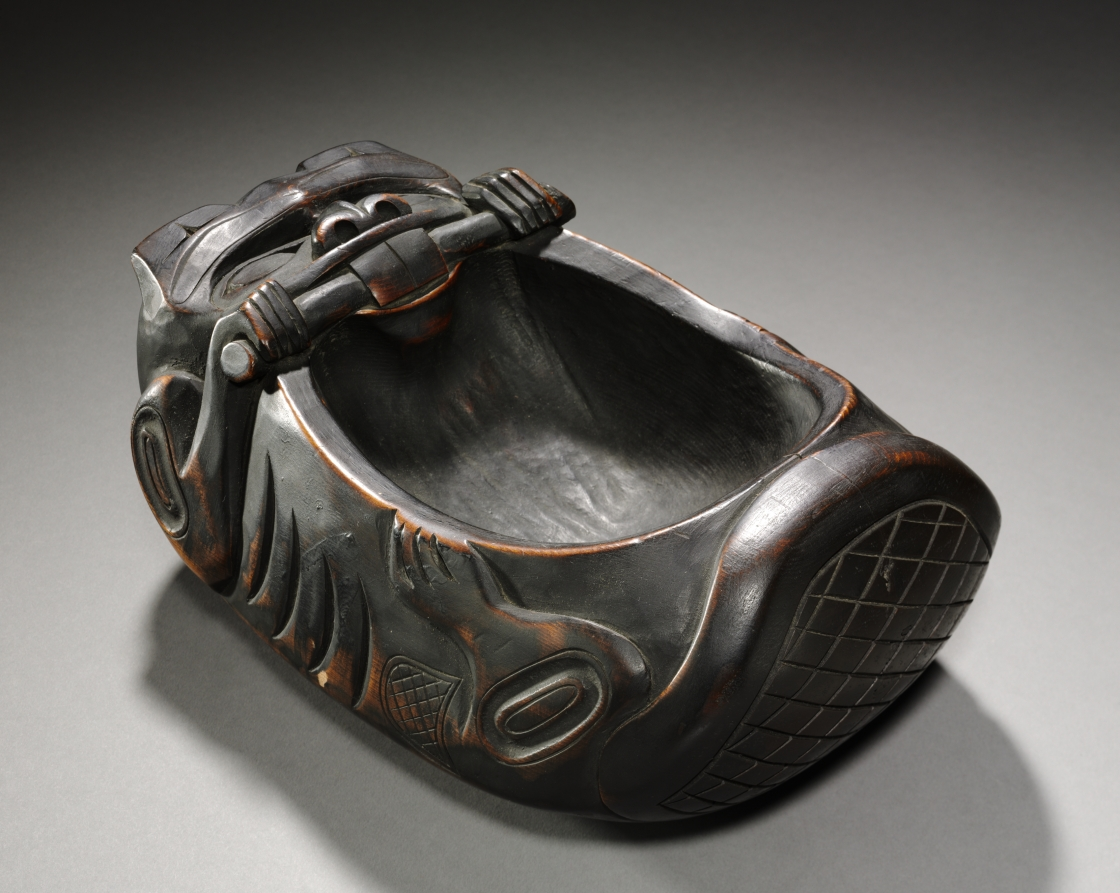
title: Beaver-Shaped Bowl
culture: Native North America, Northwest Coast, Alaska, Tlingit?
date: c. 1890–1920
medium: wood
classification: Wood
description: Bowls were a major Northwest Coast art form, used in many contexts including potlatch feasts that validated the rights and privileges of wealthy noble families. When Euro-American settlement forced a change from traditional to cash economies in the early 1900s, Indigenous carvers turned their skills to creating bowls like this example for the outside market.